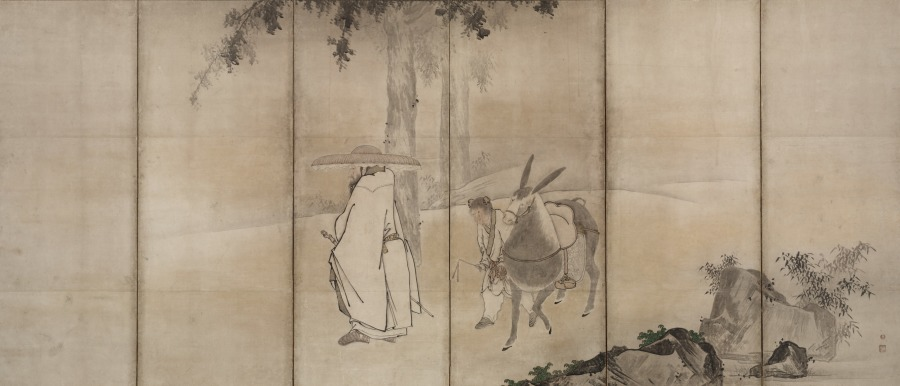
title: Su Shi (So Shoku) and Pan Lang (Han Rō)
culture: Japan, Momoyama period (1573–1615)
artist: Unkoku Tōgan (Japanese, 1547–1618)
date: early 1600s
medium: pair of six-panel folding screens; ink, light color, and gold on paper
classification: Painting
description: This pair of screens depicts episodes from the stories of famed Song-dynasty poets Su Shi of the 1000s and Zhou-dynasty official Pan Lang of the 900s. Both men were banished by their rulers for their perceived missteps. Su Shi’s comments on a series of economic reforms were seen as criticism of the emperor. Pan Lang composed an ill-advised verse about one of the king’s horses. In the left screen Pan rides backward on his donkey as he returns from exile so that he may have a last look at his now beloved Mount Hua. Su Shi, in the right screen, is shown embarking on his journey into exile. The artist of these screens, Unkoku Tōgan, was the founder of the Unkoku school of painting, which emulated the style of renowned ink painter Sesshū Tōyō (1420–1506). Tōgan was the official painter of the Mori family of what is now Yamaguchi prefecture in the south of Japan.